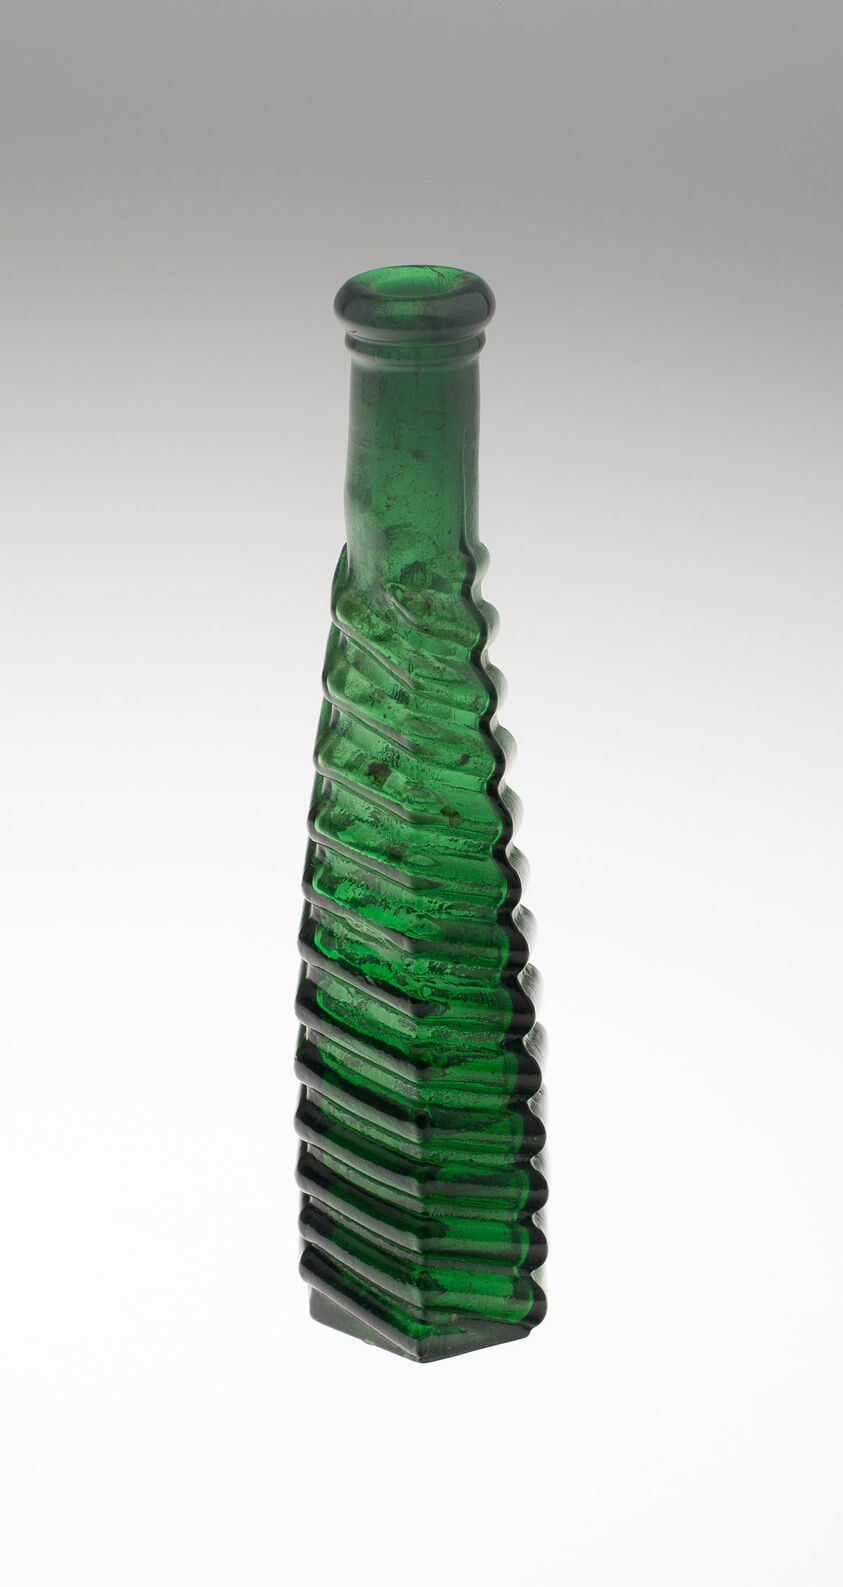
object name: Glass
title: Bottle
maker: Possibly English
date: c. 1840/50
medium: Glass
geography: Bohemia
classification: glass; european decorative arts